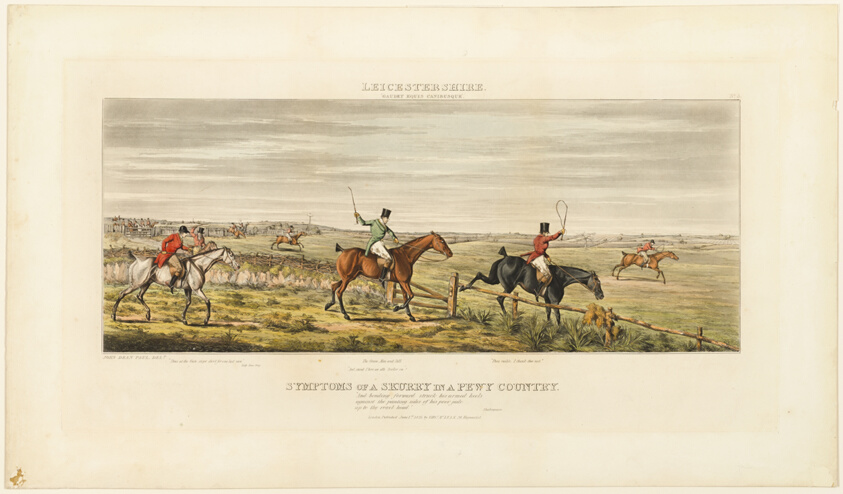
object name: Print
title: Symptoms of a Skurry, plate three from The Leicestershire Hunt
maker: John Dean Paul (English, 1775-1852); published by Thomas McLean (English, 1788-1875)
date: published 1825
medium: Hand-colored aquatint on ivory wove paper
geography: England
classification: aquatint; print; prints and drawing